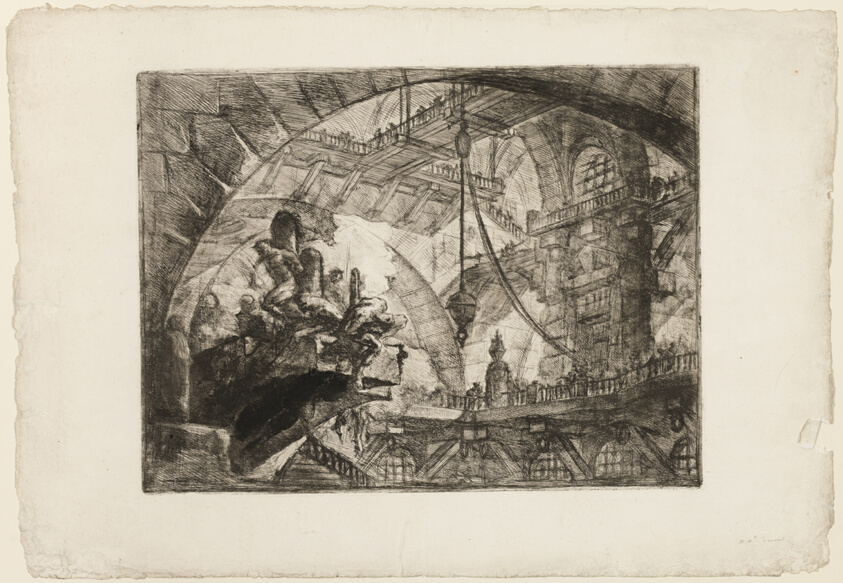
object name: Print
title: Prisoners on a Projecting Platform, plate 10 from Imaginary Prisons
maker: Giovanni Battista Piranesi (Italian, 1720-1778)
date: 1750–60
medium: Etching and engraving on heavy ivory laid paper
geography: Italy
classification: etching; print; prints and drawing